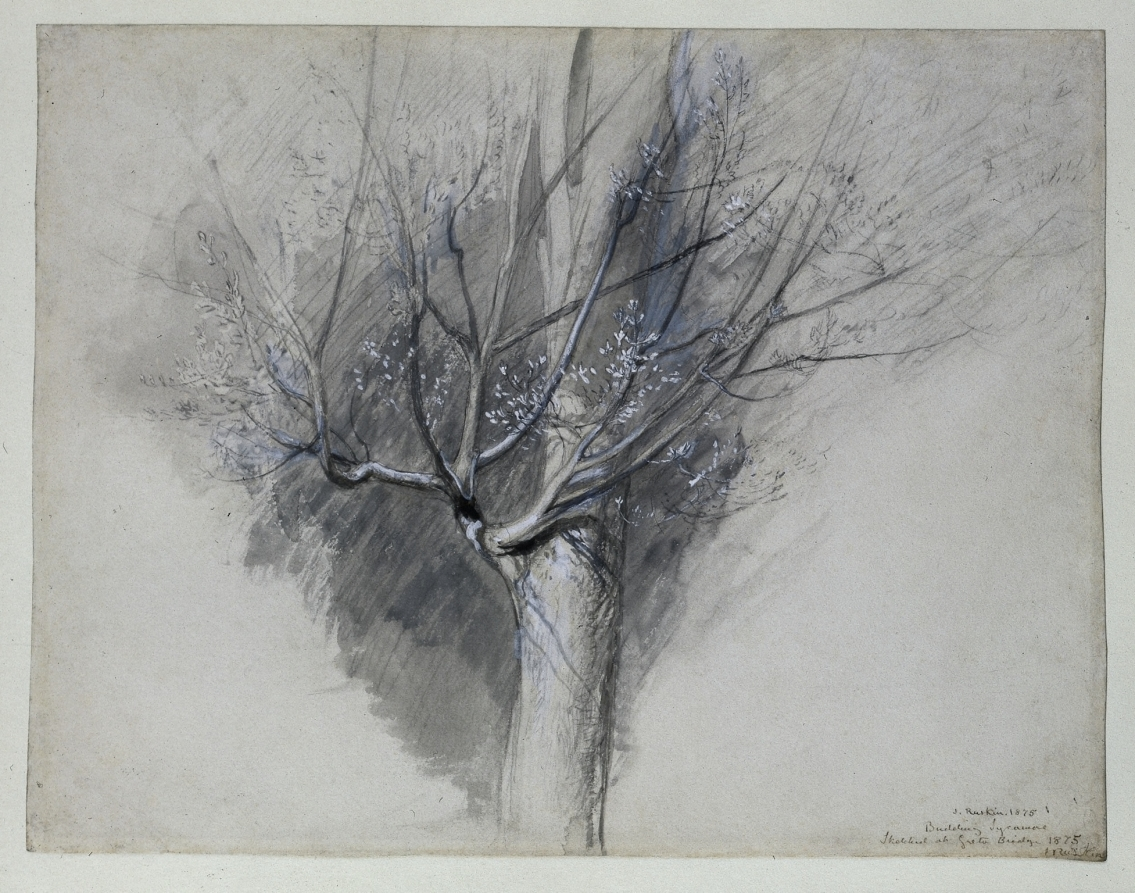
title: Budding Sycamore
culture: England, 19th century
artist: John Ruskin (British, 1819–1900)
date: c. 1876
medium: black and gray wash, gouache, and graphite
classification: Drawing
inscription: signed and inscribed, in brown ink, at lower right: 1875 / Budding Sycamore / Sketched at Greta Bridge / 1875 / J. Ruskin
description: The most influential art critic in Britain during the 19th century, John Ruskin was also an amateur artist for whom drawing was the cornerstone of artistic practice. Since his early youth, a keen perception of the world and obsessive desire to capture nature in all of its details found expression in his drawings. In this study of a leafing sycamore in early spring, Ruskin combined exquisite detail with atmospheric rendering of space, leaving the edges of the drawing unresolved. This sheet exemplifies his belief that drawn fragments, if sensitively observed, were capable of suggesting the profound mysteries of the natural world.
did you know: This drawing was used as an illustration in John Ruskin's manual on drawing, Rudimentary Studies.